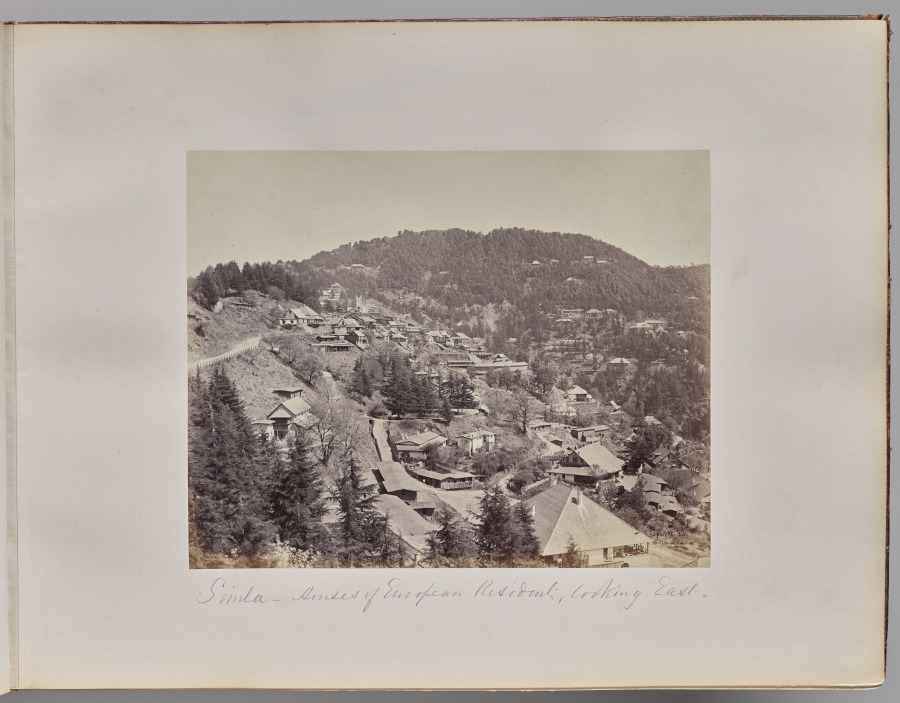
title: Shimla. Houses of European Residents, Looking East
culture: England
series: Photographs of Northern India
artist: Samuel Bourne (British, 1834–1912)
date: 1863–70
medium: albumen print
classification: Photograph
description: The 50 images in this album, all taken in the 1860s, move from the hill towns of the Himalayas down to cities including Lahore (now in Pakistan), Delhi, Lucknow, Agra, Benares (now Varansi), and Calcutta (now Kolkata). Architectural studies of major monuments offer valuable historical records of what sites such as the Taj Mahal and the imperial mosque of the Mughal emperors in Delhi looked like before twentieth-century restorations.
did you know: Samuel Bourne, the author of most the images in this album, was a banker in England before he moved to India to become a professional photographer.